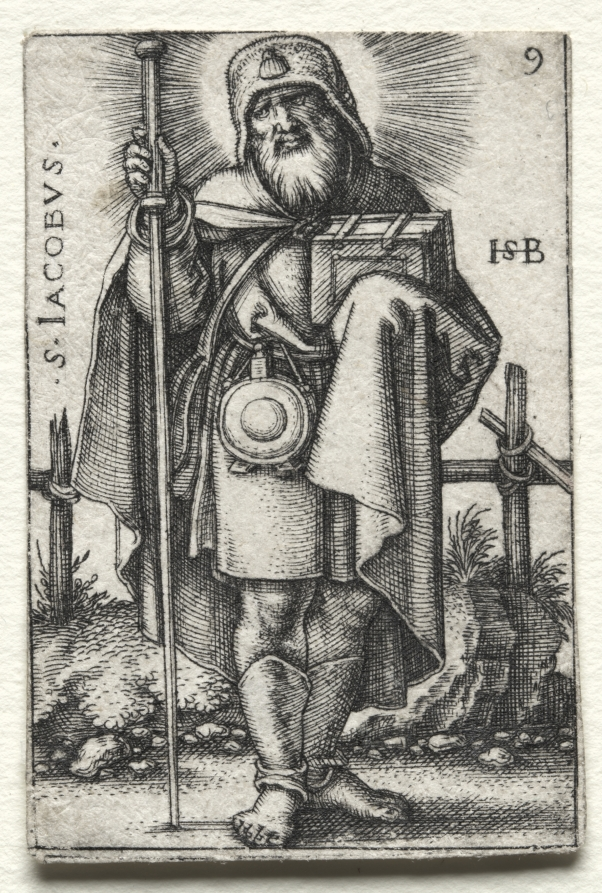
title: St. James the Great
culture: Germany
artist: Hans Sebald Beham (German, 1500–1550)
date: 1545–1546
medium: engraving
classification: Print